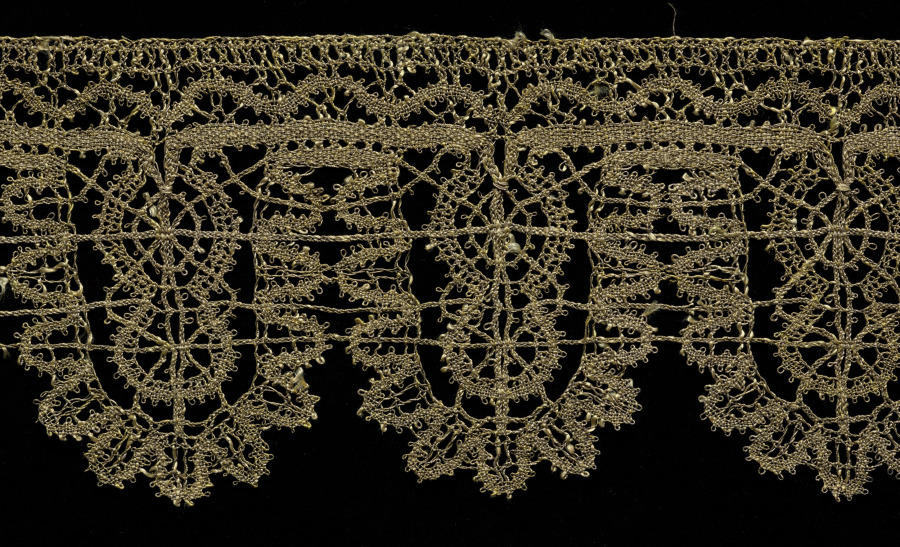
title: Lace Edging of Points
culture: Italy, Genoa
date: 1600s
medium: Metal thread: bobbin lace (rose lace)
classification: Lace